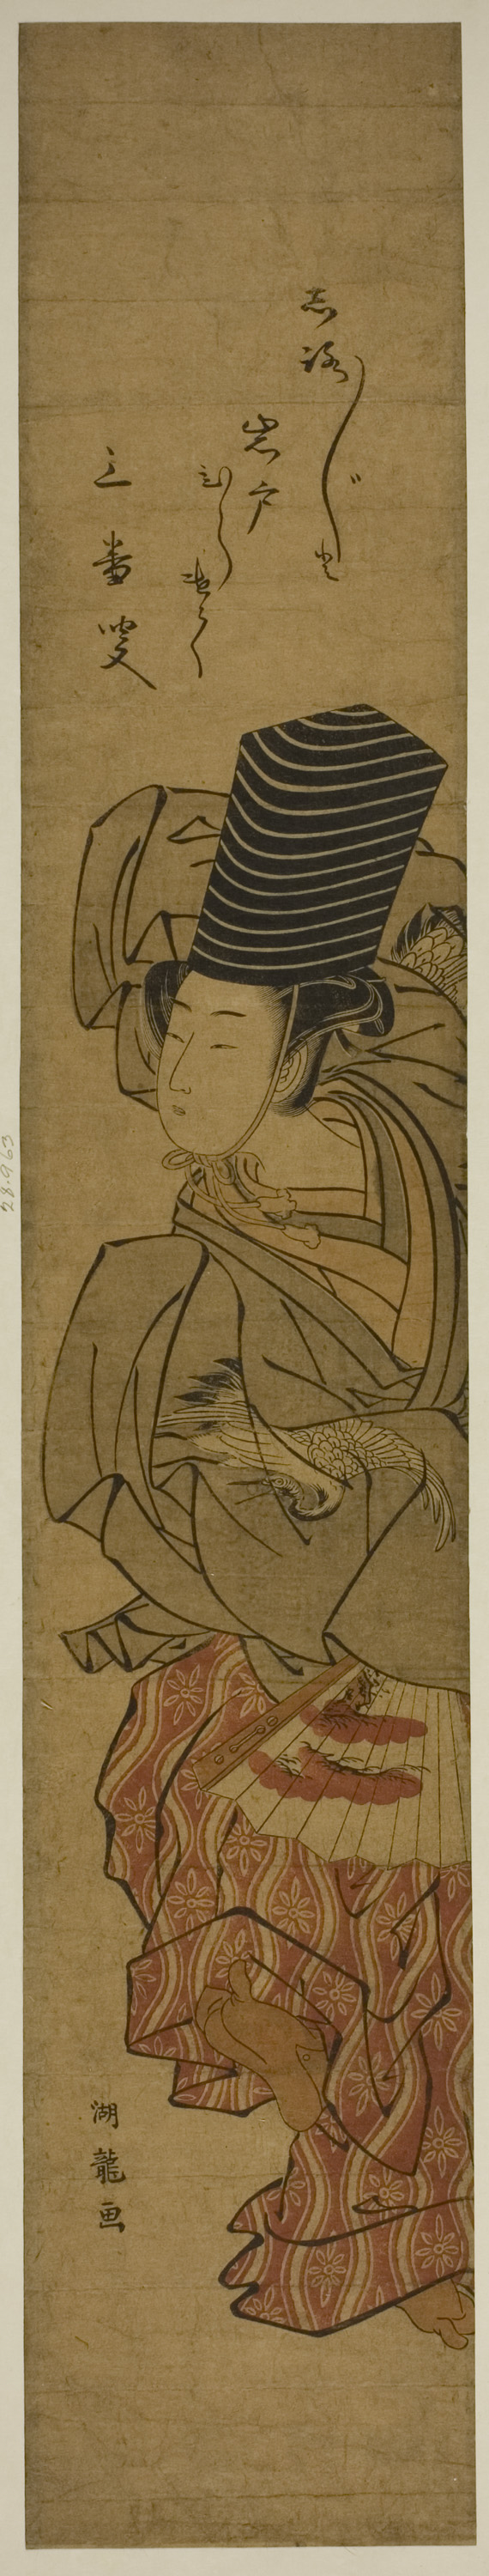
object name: Print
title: Young Woman Performing Sanbaso Dance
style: Japanese (culture or style)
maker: Isoda Koryusai (Japanese, 1735-1790)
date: c. 1775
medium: Color woodblock print; hashira-e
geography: Japan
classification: woodblock print; print; asian art